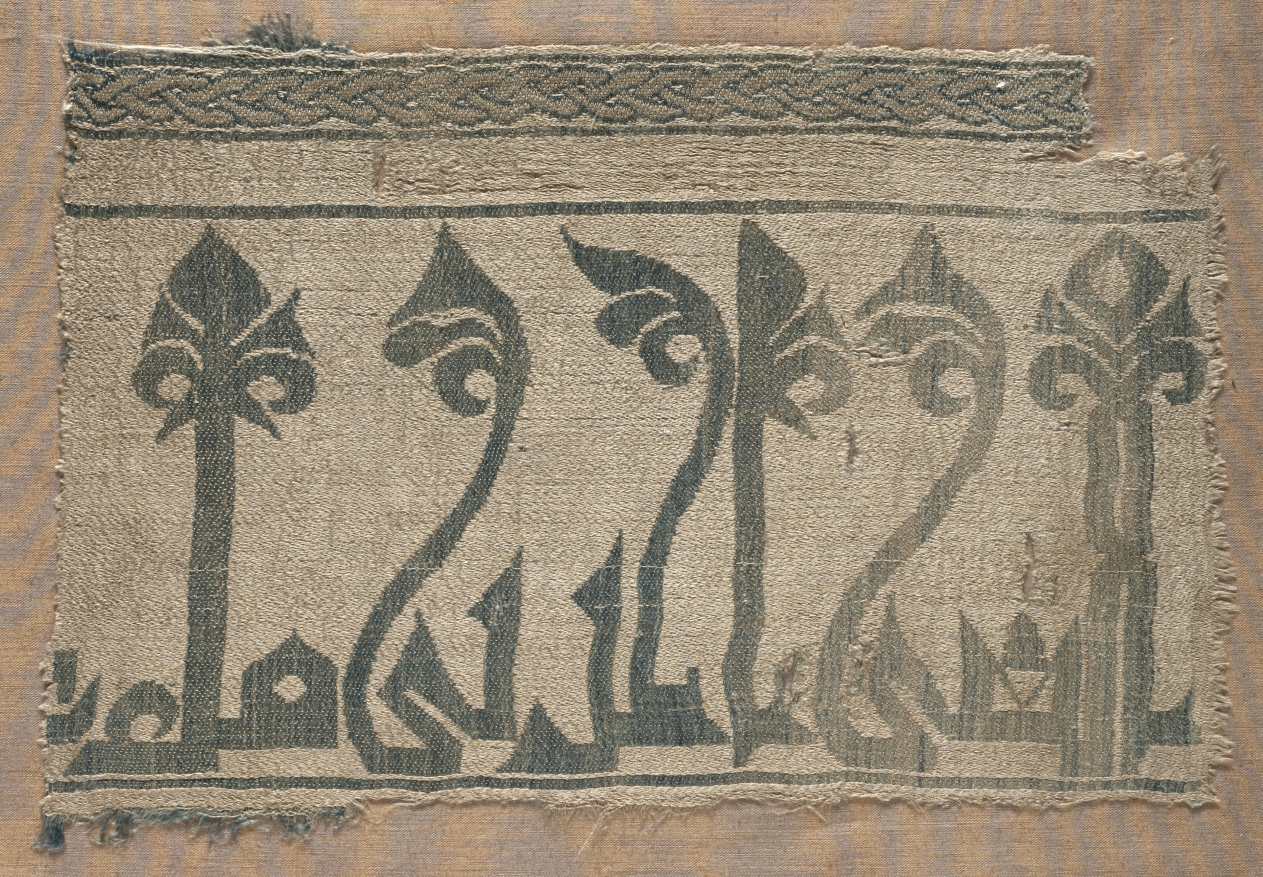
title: Fragment from Funeral Garment or Pall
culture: Iran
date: before 1958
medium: Silk: lampas weave, brocaded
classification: Textile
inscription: ilahi ajirni min 'adhabika innani asir dhalil kha'if laka akhda'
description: A wide band of large-scale Kufic inscription repeating the first words from a diwan of poems attributed to the Caliph Ali is brocaded in blue on a tan ground. The inscription runs at right angles to the warp. Above is a narrow guilloche band. Both bands are defined by guard stripes.